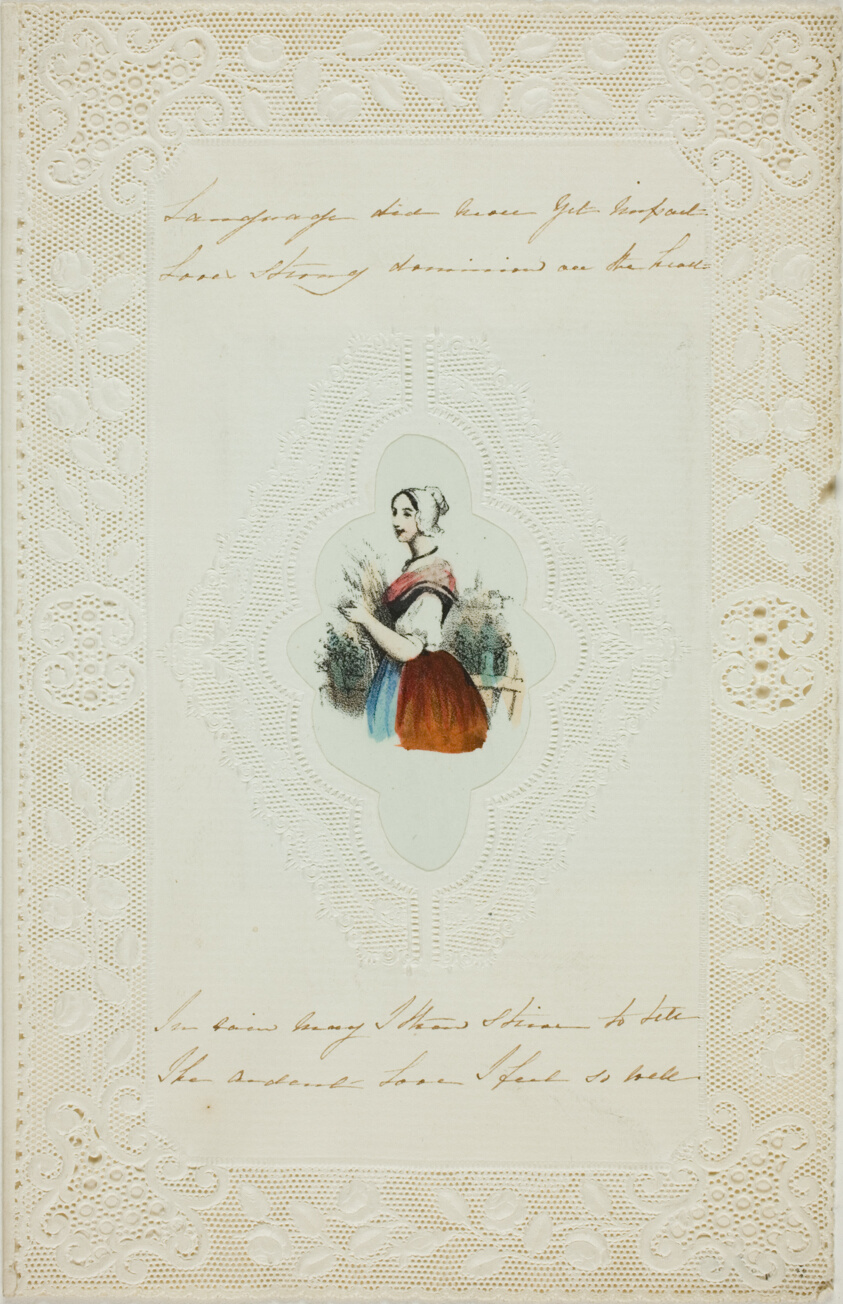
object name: Print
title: Language Did Have Yet (valentine)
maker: Unknown Artist; English, 19th century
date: c. 1850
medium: Lithograph with hand-coloring collaged onto cut and embossed ivory wove paper with pen and brown ink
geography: England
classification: valentine; prints and drawing; print